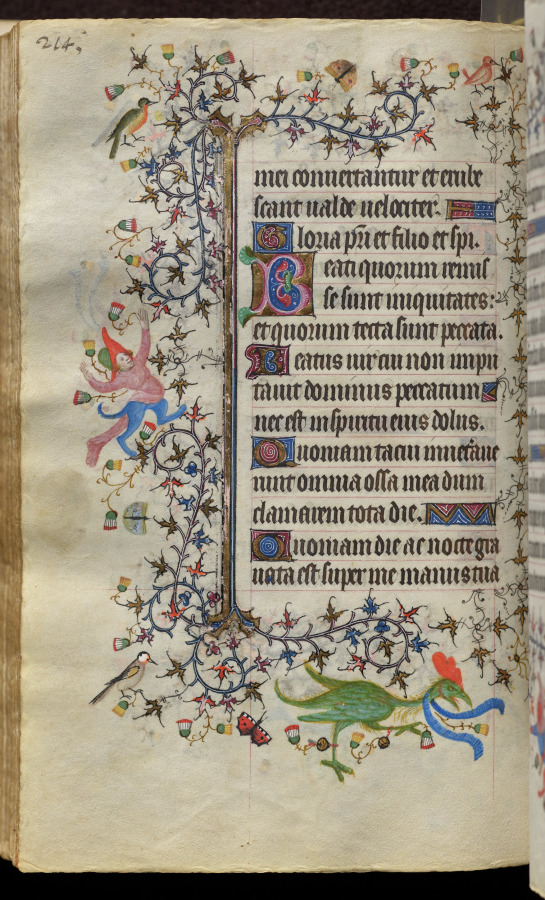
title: Hours of Charles the Noble, King of Navarre (1361-1425): fol. 107v, Text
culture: France, Paris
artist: Master of the Brussels Initials and Associates (French)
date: c. 1405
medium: ink, tempera, and gold on vellum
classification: Bound Volume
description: This precious volume was obviously highly prized by its owner, the French-born King of Navarre, who had his coat of arms painted on no less than twenty folios. Rather than directly commissioning this manuscript from a specific workshop, it seems that Charles the Noble acquired his book of hours -- perhaps ready-made for the luxury market -- while on a trip to Paris in 1404-05. A collaborative effort, six painting styles are evidenced within the pages of this codex, those of two Italians, two Frenchmen, and two Netherlanders. The painter who was responsible for the planning and decoration of the book, and who produced seventeen of the large miniatures, was a Bolognese artist known as the Master of the Brussels Initials. His principal assistant, responsible for most of the borders, was a Florentine who signed his name "Zecho" da Firenze on folio 208 verso.